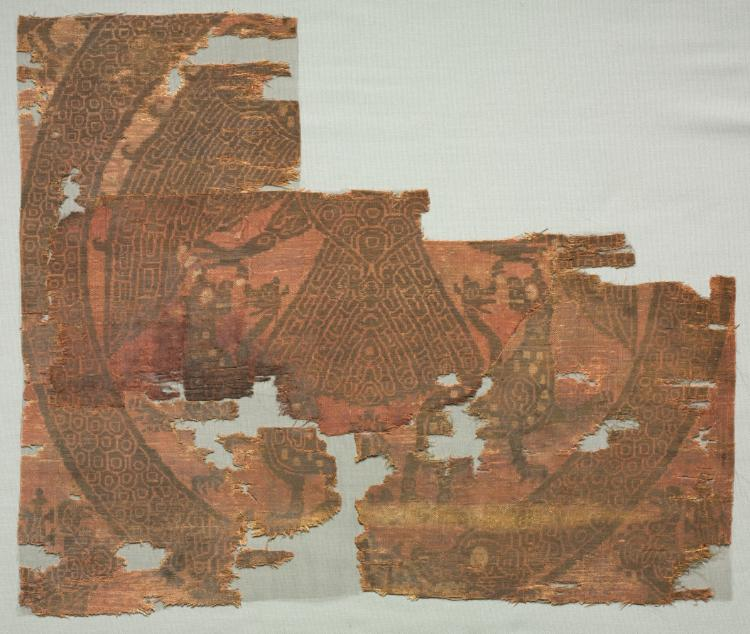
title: Fragment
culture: Byzantium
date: 900s–1000s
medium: Silk and gold: compound twill, brocaded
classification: Textile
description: The design of this textile offers an interesting iconographic puzzle. The double-headed eagle was a common motif in the art of the Near East in ancient times and from there seems to have found its way into Byzantine and European art. The animal tail ending in an animal's head is also found in Near Eastern art and is particularly noted in textiles of the Seljuk period (1000s–1100s) in Persia. However, the division of the roundel frame into two halves ending in animal heads is not known in the art of the Near East nor is the continuous knot motif which occurs just behind the animal head of the frames. Both of these motifs are familiar in the art of the Anglo-Saxon, Germanic, and Scandinavian peoples of Europe.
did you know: The entire pattern is in gold thread, except for such minor details as claws and eyes which are in golden tan silk on a rose-red ground.